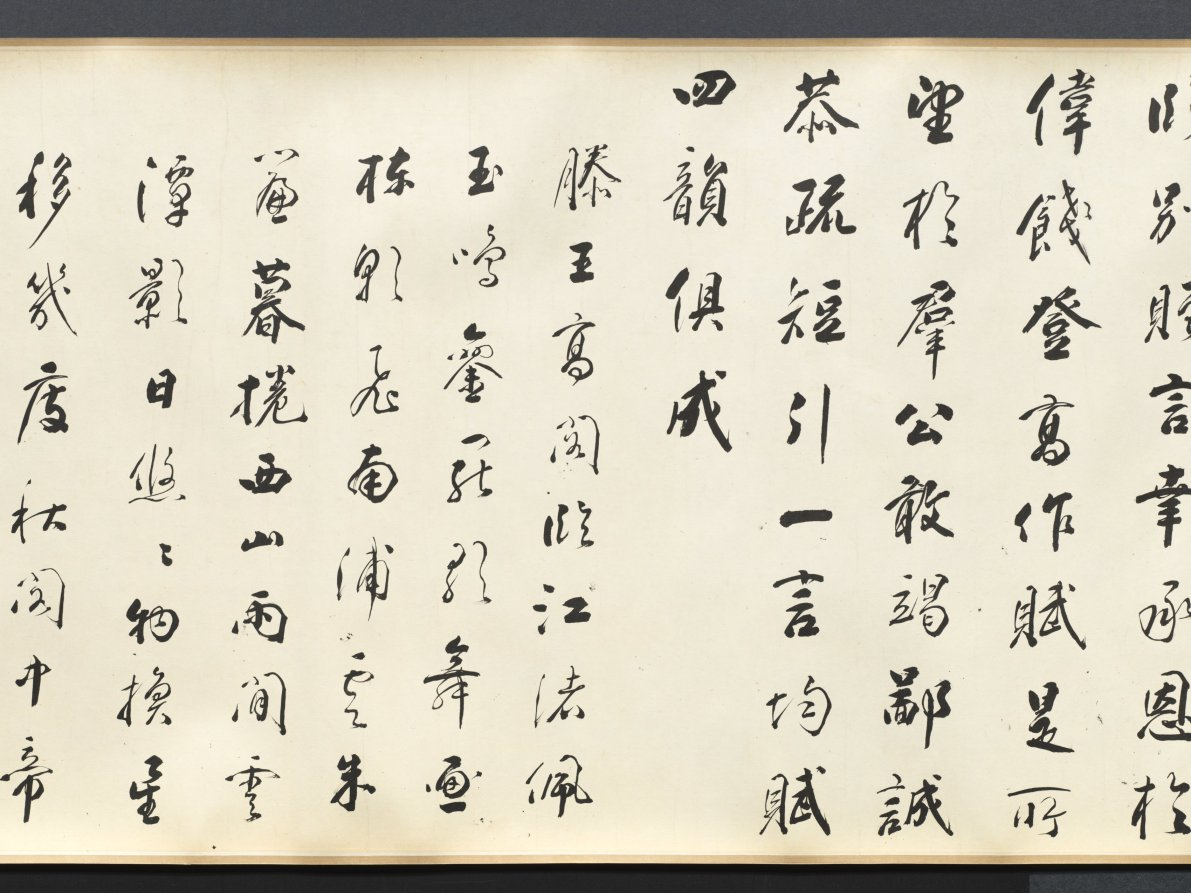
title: Calligraphy in Running Style based on Wang Bo's Essay on Tengwang Pavilion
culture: China, Changbai, Qing dynasty (1644-1911)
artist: Tiebao (Chinese, 1752–1824)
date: 1811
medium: handscroll, ink on paper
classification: Calligraphy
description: A member of the Donggo clan, Tiebao belonged to the Manchu Plain Yellow Banner army. As an official in the Qing court, he endured considerable vicissitude and his career was never smooth. Celebrated as a man of letters, he oversaw the publications of the Manchu military system as well as an anthology of poems by members of the imperial family and other Manchu dignitaries. In calligraphy, he was regarded as the equal of such eighteenth-century luminaries as Liu Yong (1720-1805) and Weng Fanggang (1733-1818). This handscroll is a work of his mature years and is exemplary of his disciplined and highly subtle approach to the art of calligraphy.